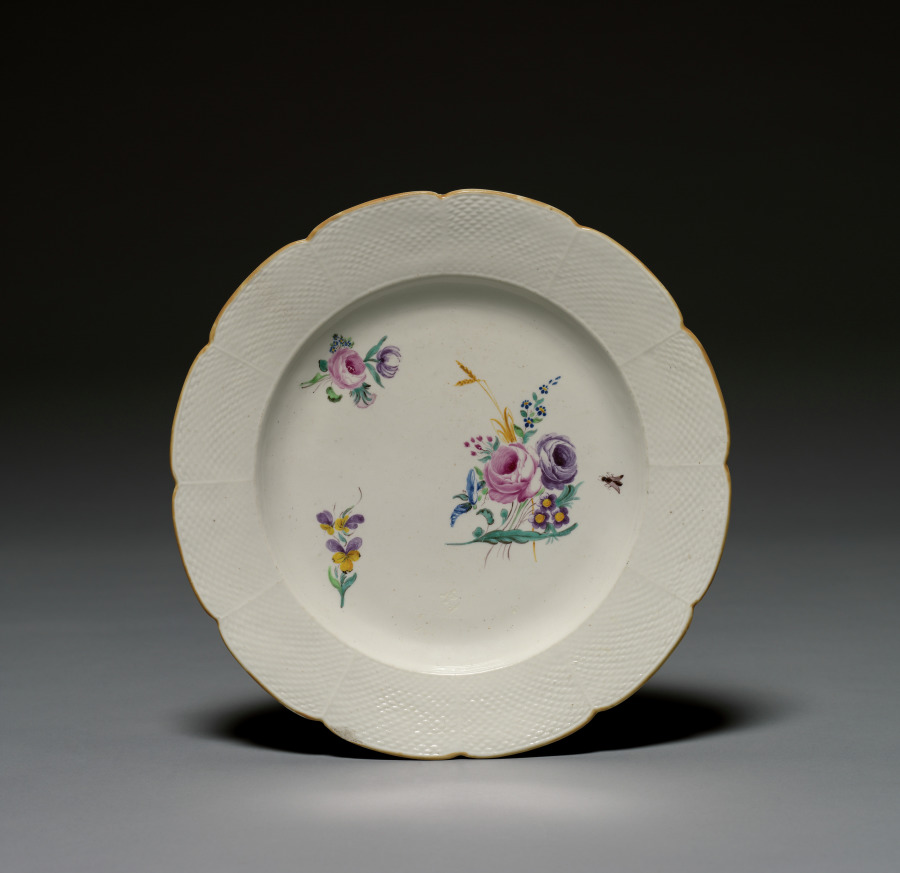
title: Plate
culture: France, Chantilly, 18th century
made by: Chantilly Porcelain Factory (French)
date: c. 1765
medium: soft-paste porcelain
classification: Ceramic